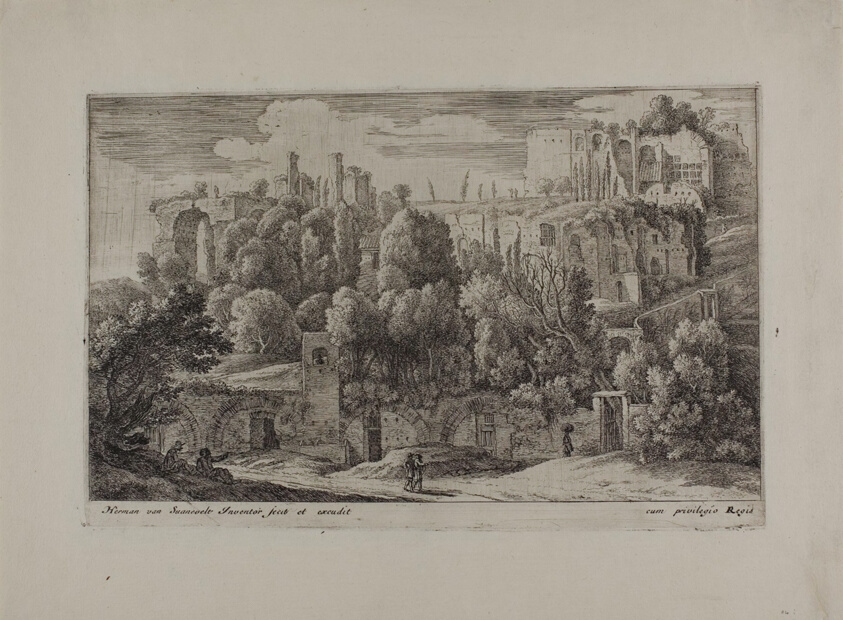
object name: Print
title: Antique Ruins of an Amphitheater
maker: Herman van Swanevelt (Dutch, c. 1600-1655)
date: 1650–55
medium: Etching in black on ivory laid paper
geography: Holland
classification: etching; print; prints and drawing